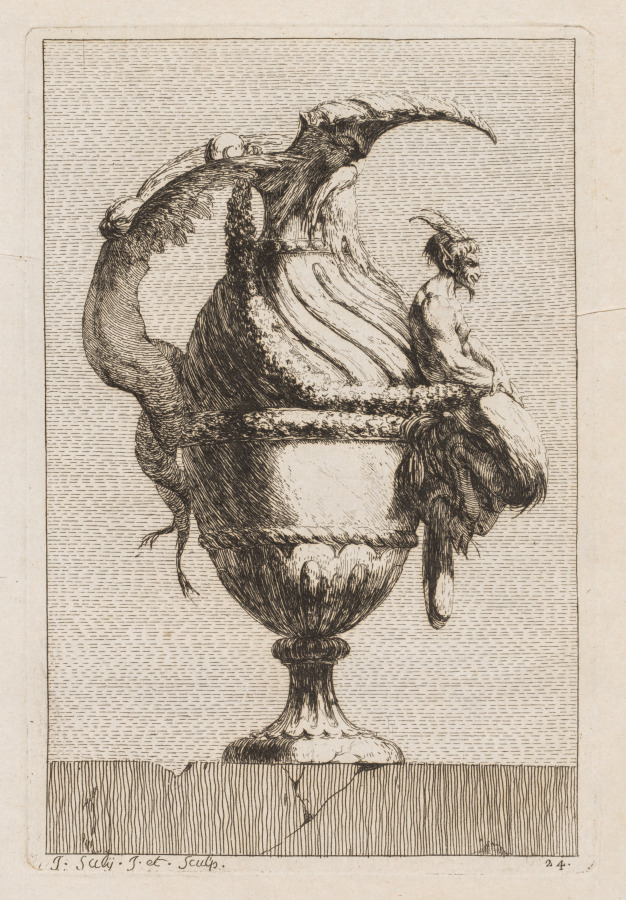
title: Suite of Vases: Plate 24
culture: France, 18th century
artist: Jacques François Saly (French, 1717–1776)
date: 1746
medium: etching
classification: Print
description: Trained as a sculptor, Saly etched a series of 30 vase designs while studying at the Académie de France in Rome. After his return to Paris, the publication announcement for the Suite of Vases endorsed the prints as an indication of the sculptor’s ingenuity and freedom of design. The vase designs also nourished an appetite for the revival of classical elements, or Neoclassicism, in decorative arts that developed in the mid-18th century.